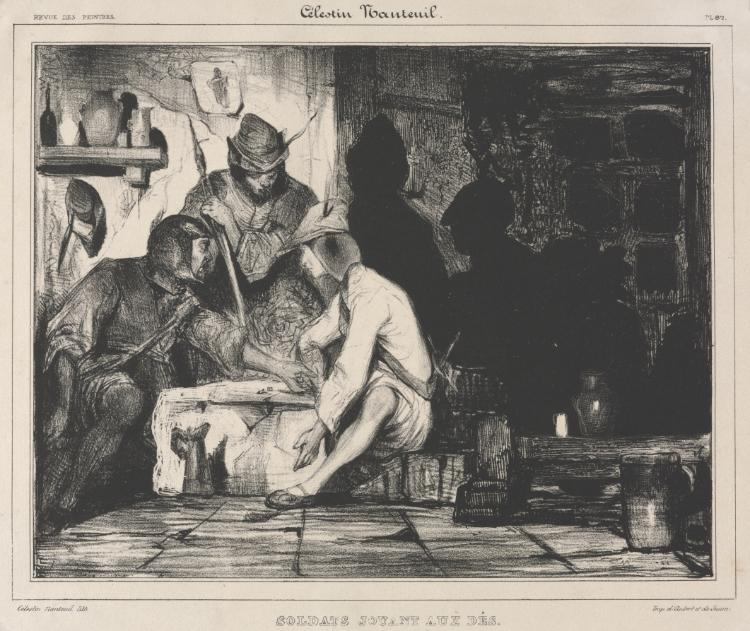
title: Soldiers Playing Dice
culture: France, 19th century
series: Revue des Peintres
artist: Célestin François Nanteuil (French, 1813–1873)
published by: Aubert & Junca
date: 1900s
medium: lithograph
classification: Print